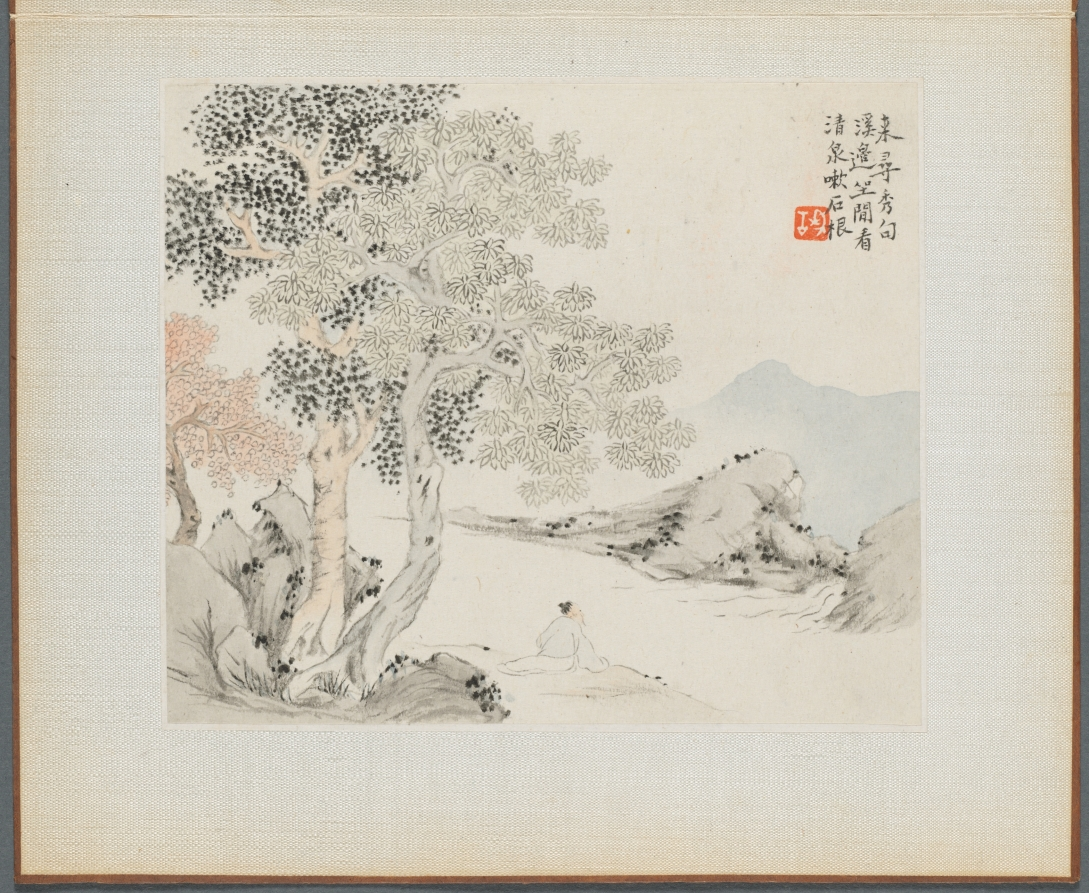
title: Album of Landscape Paintings Illustrating Old Poems: Three Big Trees, a Stream with an Old Man Sitting on the Bank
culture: China, Qing dynasty (1644-1911)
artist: Hua Yan (Chinese, 1682–c. 1765)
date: 1745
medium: album leaf, ink and light color on paper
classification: Painting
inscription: Coming and sitting down on the bank, I want to find some nice words for my poem. I watch the clear water washing the root of the stones. not signed, with a seal of the artist.